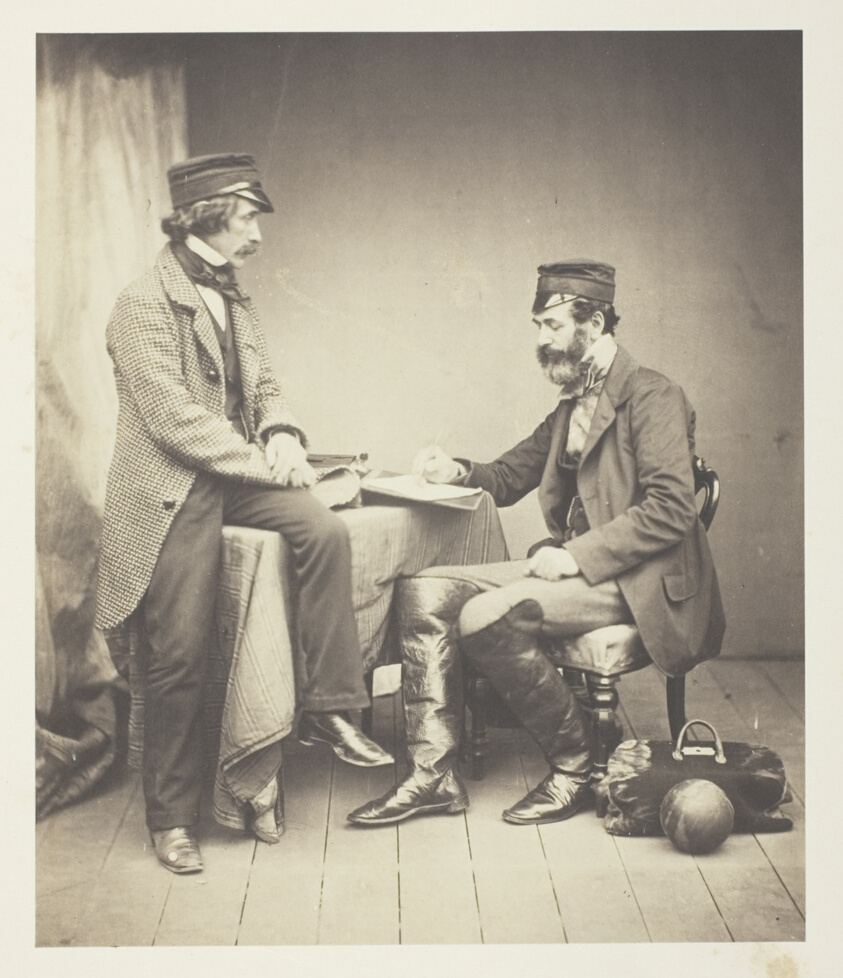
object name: Photograph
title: The Sanitary Commission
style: 19th century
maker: Roger Fenton (English, 1819–1869)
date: 1855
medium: Salted paper print, plate 9 from the album "Photographs Taken in the Crimea" (1856)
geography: England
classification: salted paper print; photographic process; photography; photograph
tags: Collected by Hugh Edwards, Crimea 1856